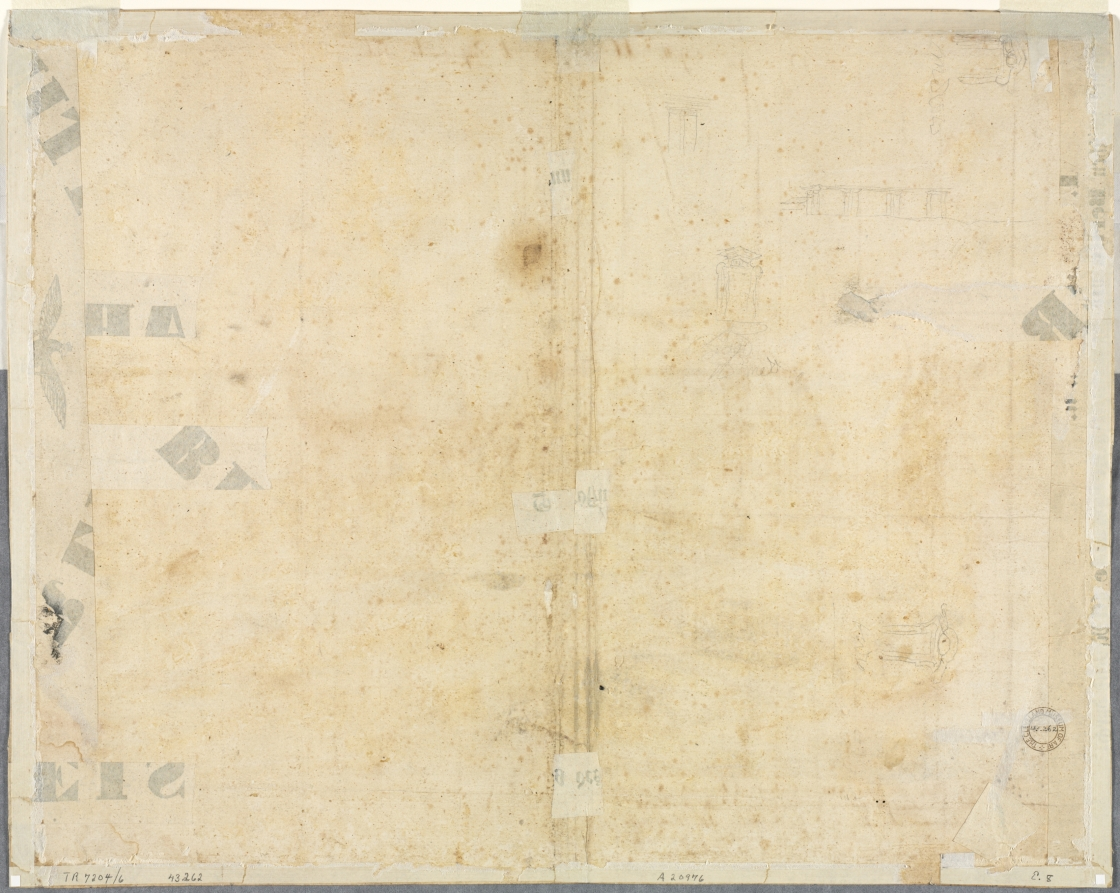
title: Sketches of Windows and Pilasters of the Attic Storey of the Collegio di Propaganda Fide (verso)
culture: Flanders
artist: Lievin Cruyl (Flemish, c. 1640-c. 1720)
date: 1665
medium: graphite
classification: Drawing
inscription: upper left, in brown ink: S45[masked] ; upper right, in graphite(?): me[illegible, sideways] ; center, in graphite(?): [illegible] / me[illegible] ; ON PAPER STRIP MOUNTED TO PERIMETER, lower center, in graphite: A20976 ; lower right, in graphite: E. 8